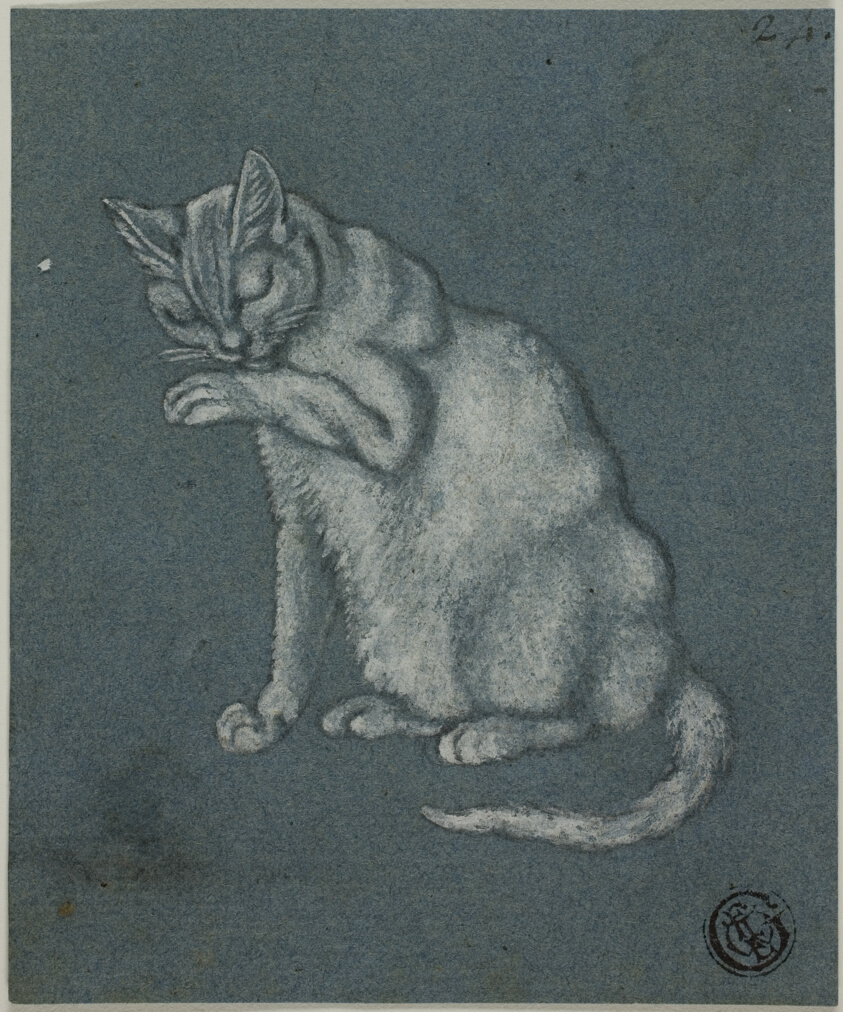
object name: Drawing and Watercolor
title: Cat Licking Paw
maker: Unknown Artist; European, 18th/19th century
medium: Lead white gouache (discolored), with graphite, on blue laid paper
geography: Europe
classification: gouache; drawings (visual works); prints and drawing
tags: cats, animals